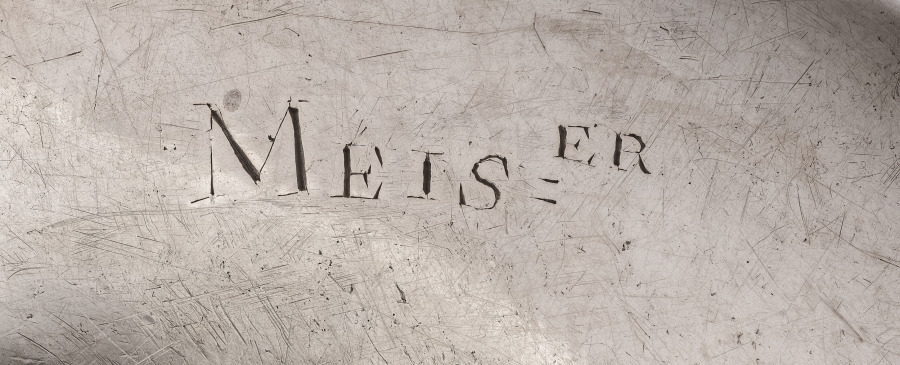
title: Cover for a Tureen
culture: France, Paris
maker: Henry Adnet (French, 1745)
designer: Juste-Aurèle Meissonnier (French, 1695–1750)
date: 1735–38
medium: silver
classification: Silver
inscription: engraved Meissonnier signature.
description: See entry for cover record 1977.182.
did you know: The langoustine, pigeon, and vegetables were cast using real examples giving the silver copies lifelike detail and appearance.